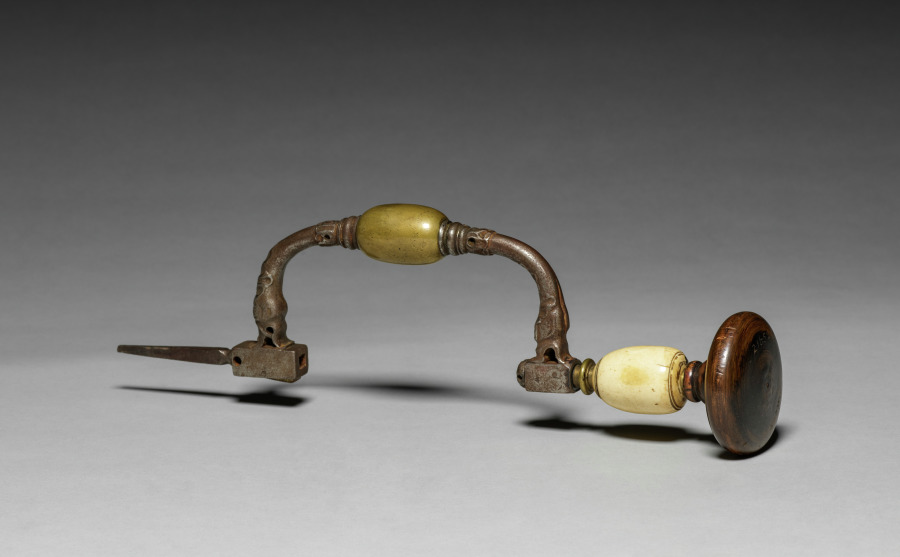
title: Brace and Bit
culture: Germany ?, 17th century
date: 1600s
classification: Tool